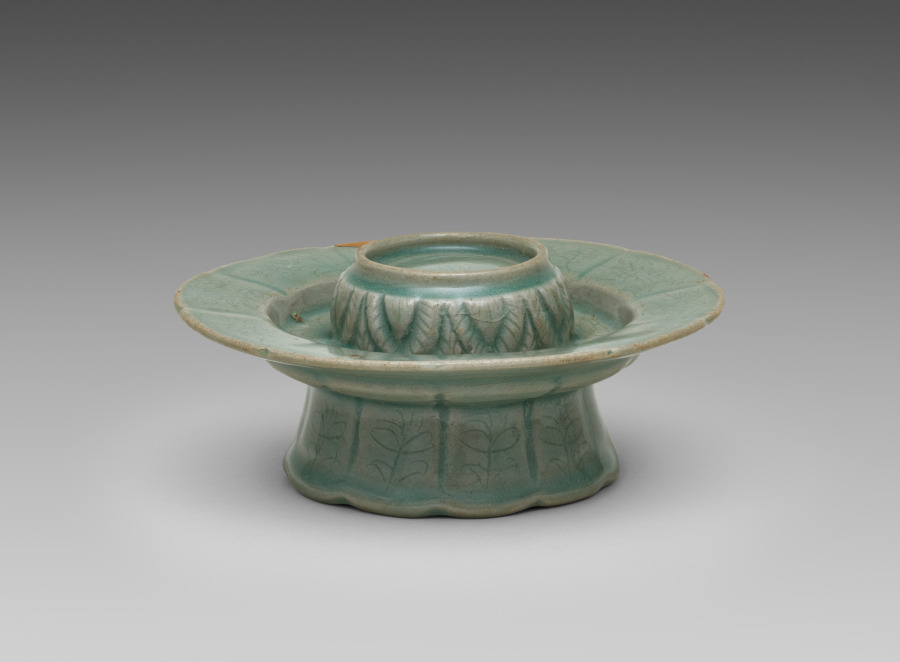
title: Floral-shaped Cup Stand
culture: Korea, Goryeo dynasty (918–1392)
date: 1100s-1200s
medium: celadon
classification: Ceramic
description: As early as the seventh century, the practice of drinking tea became an important part of elite culture in Korea. In enjoying teas, elites commissioned a variety of types of utensils and vessels including this delicate-looking cup stand, not only to make their tea-drinking experience more exciting, but also to show their refined taste.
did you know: According to a historical record, the cultivation of tea in Korea was initiated with green tea plant seeds from China by royal order in 828.